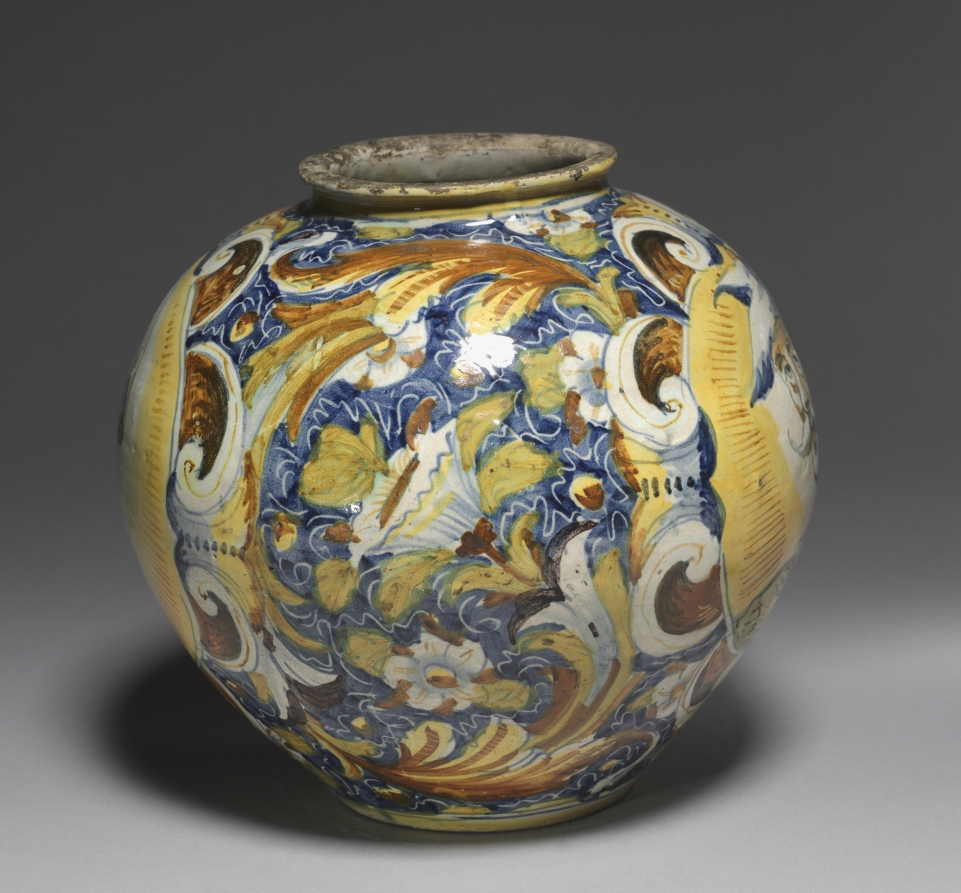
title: Storage Jar (Vaso a Palla)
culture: Italy, Venice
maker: circle of Domenego da Venezia (Italian)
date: c. 1560–80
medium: tin-glazed earthenware (maiolica)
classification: Ceramic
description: During the Italian Renaissance of the 1400s and 1500s, nobles and merchants eager to express their wealth and sophistication ordered ceramics for dining, display, and storage. Known as maiolica, because it resembled the brightly colored ceramics from the Mediterranean island of Majorca, these ceramic vessels were covered with a tin glaze that provided an opaque white surface on which colorful decoration could be painted.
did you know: In contrast to a pharmacy jar, this Vaso a Palla (globular or round-shaped jar), likely served a more domestic function and may have held oil or preserved fruits and nuts.